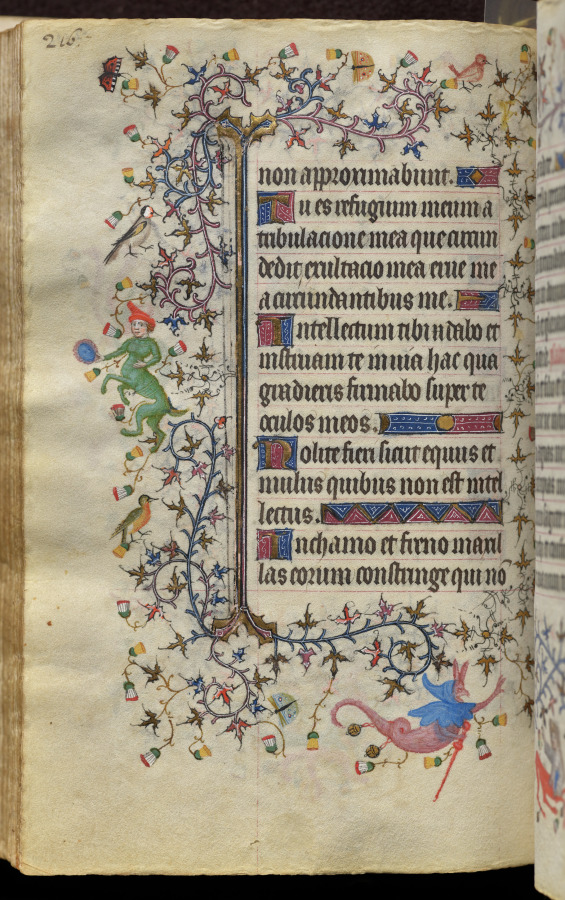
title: Hours of Charles the Noble, King of Navarre (1361-1425): fol. 108v, Text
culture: France, Paris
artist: Master of the Brussels Initials and Associates (French)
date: c. 1405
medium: ink, tempera, and gold on vellum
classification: Bound Volume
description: This precious volume was obviously highly prized by its owner, the French-born King of Navarre, who had his coat of arms painted on no less than twenty folios. Rather than directly commissioning this manuscript from a specific workshop, it seems that Charles the Noble acquired his book of hours -- perhaps ready-made for the luxury market -- while on a trip to Paris in 1404-05. A collaborative effort, six painting styles are evidenced within the pages of this codex, those of two Italians, two Frenchmen, and two Netherlanders. The painter who was responsible for the planning and decoration of the book, and who produced seventeen of the large miniatures, was a Bolognese artist known as the Master of the Brussels Initials. His principal assistant, responsible for most of the borders, was a Florentine who signed his name "Zecho" da Firenze on folio 208 verso.